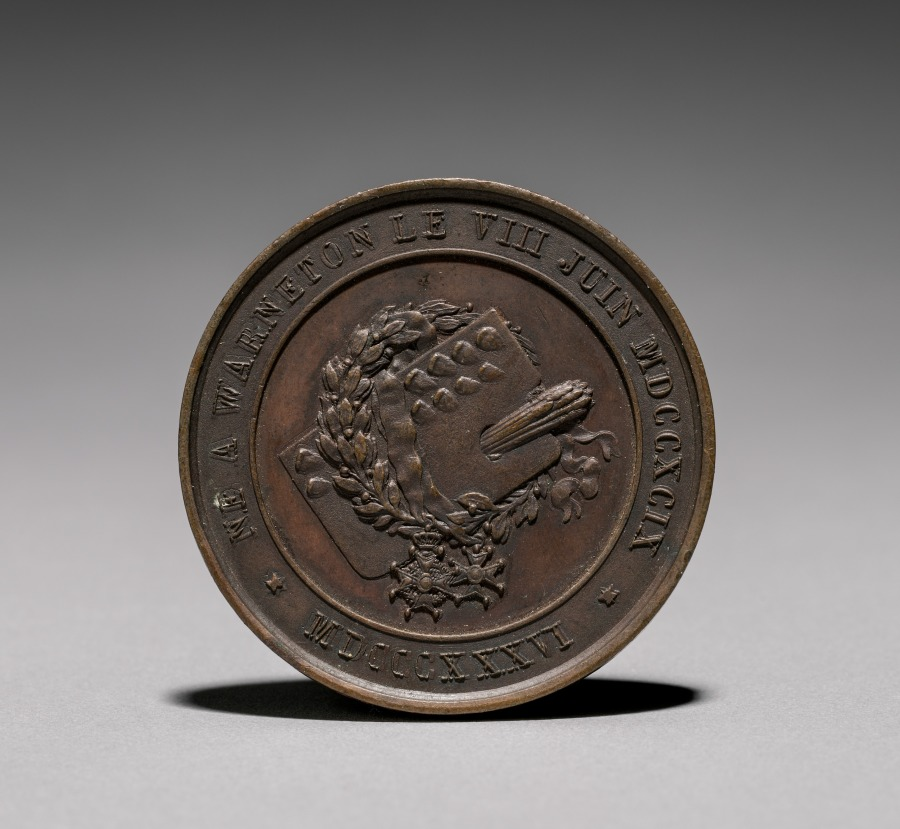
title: Medal: Eugene Verboeckhoven (reverse)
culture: 19th century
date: 1800s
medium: bronze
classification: Metalwork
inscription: "N. E. A. W. A. R. N. E. TONLE VIII JVIN MDCCXCIX. MDCCCXXXVI."